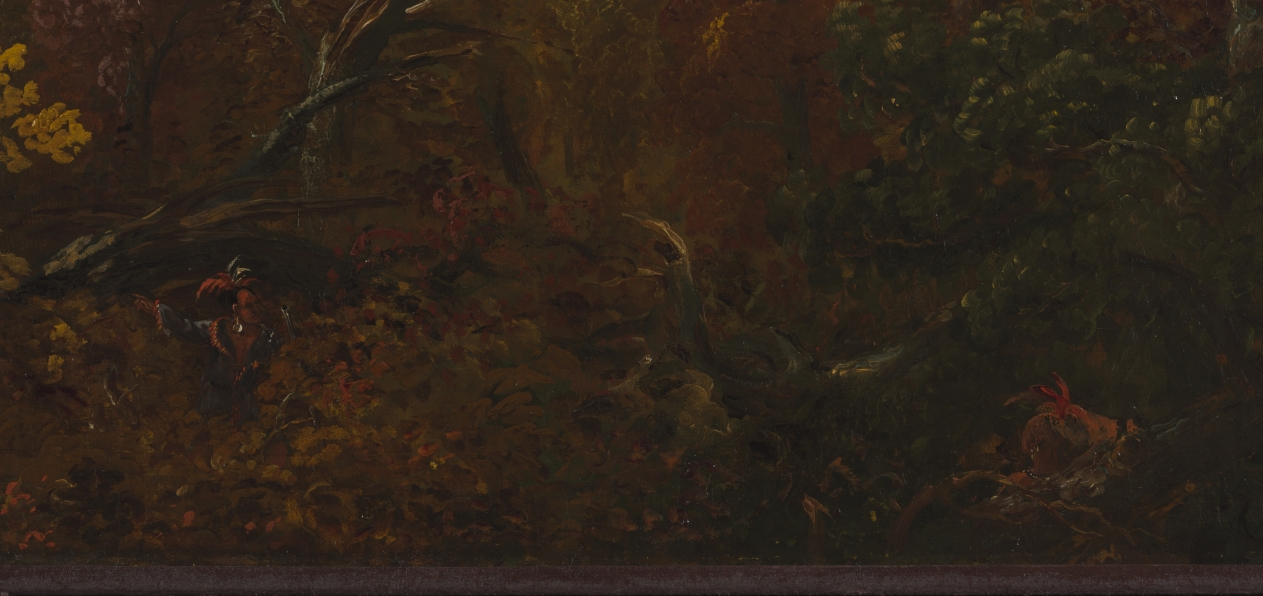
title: View of Schroon Mountain, Essex County, New York, After a Storm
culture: America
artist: Thomas Cole (American, born England,1801–1848)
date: 1838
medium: oil on canvas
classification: Painting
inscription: signed lower left: T. Cole / Catskill 1838.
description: Championing the American wilderness, Cole declared, "We are still in Eden," in his Essay on American Scenery, published two years before he painted this view of the Adirondacks. The artist sketched the scene in early summer, but when he created the painting in his studio, he rendered it in a dramatic blaze of fall colors. Such a choice likely had nationalistic overtones; he once proclaimed that autumn was "one season where the American forest surpasses all the world in gorgeousness." Cole included two Indigenous men in the painting’s right foreground foliage. At this time, the Adirondacks remained home to many Native Americans long after most had been forcibly removed from land east of the Mississippi River. While continuing to live, hunt, and fish in the area, these Algonquian and Iroquoian peoples were compelled to significantly adapt their existence amid increasing White settlement and its attendant lumber, mining, and tourist industries.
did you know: Nicknamed "Schroon Mountain" by the artist, the peak's official name is Hoffman Mountain.